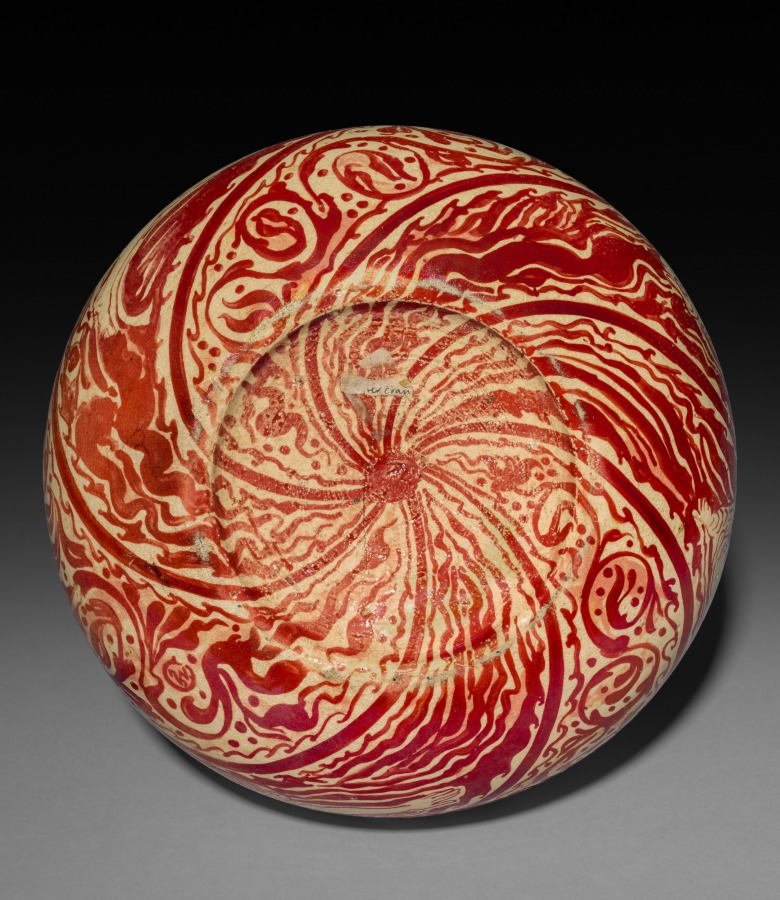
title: Vase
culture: Britain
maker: Walter Crane (British, 1845–1915)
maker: Maw & Co. (British (modern), 1850–1969)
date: 1889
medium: Earthenware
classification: Ceramic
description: Walter Crane was one of the leading figures of the British Arts and Crafts movement. His work helped establish a renewed interest in Renaissance ceramics and the importance of illustration in decorative ceramics. He collaborated with several major manufacturers of decorative furnishings including Maw & Co., an important manufacturer of aesthetic period tiles and other decorative ceramics. This vase is one of a series of vases that Crane designed for Maw around 1889 when they first appear listed in the catalogue of the Arts and Crafts Exhibition Society in London of that year, described along with a series of tiles that Crane also designed for Maw. Its brilliant ruby-red luster surface is a hallmark of Maw’s work featuring Crane’s lyrical designs while referencing earlier 15th- and 16th-century Spanish lusterware.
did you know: The red glaze on this vase resembles the color of oxblood.